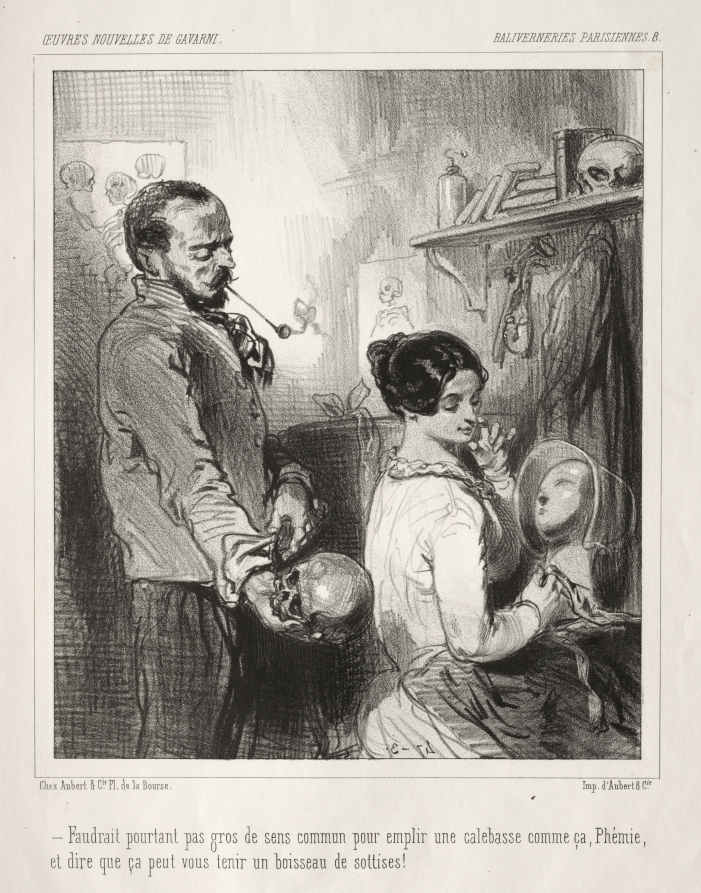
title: Baliverneries Parisiennes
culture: France, 19th century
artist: Paul Gavarni (French, 1804–1866)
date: c. 1847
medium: lithograph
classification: Print